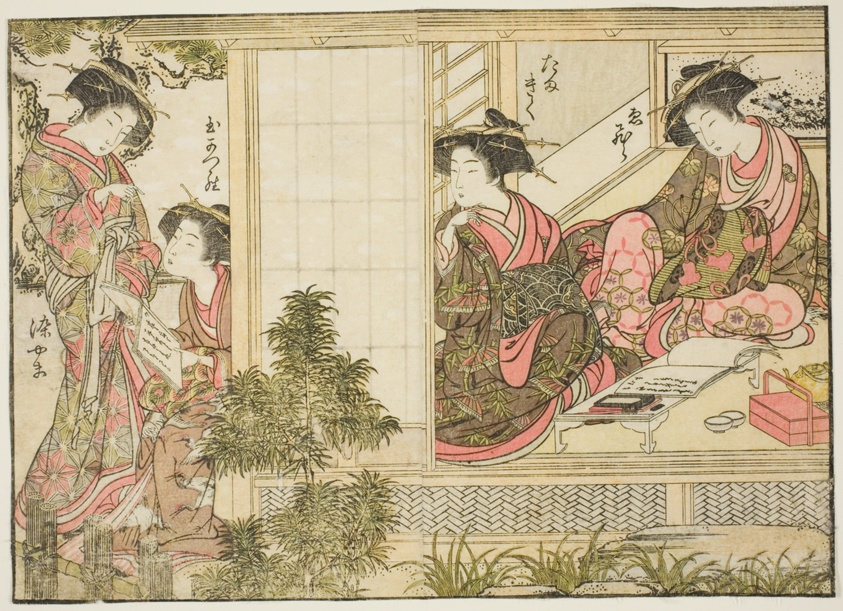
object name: Print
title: Courtesans of Oebuji, from the book "Mirror of Beautiful Women of the Pleasure Quarters (Seiro bijin awase sugata kagami)," vol. 2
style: Japanese (culture or style)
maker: Katsukawa Shunsho; Japanese, 1726-1792; Kitao Shigemasa; Japanese, 1739-1820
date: 1776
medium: Color woodblock print; double-page illustration cut from a book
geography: Japan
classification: print; asian art